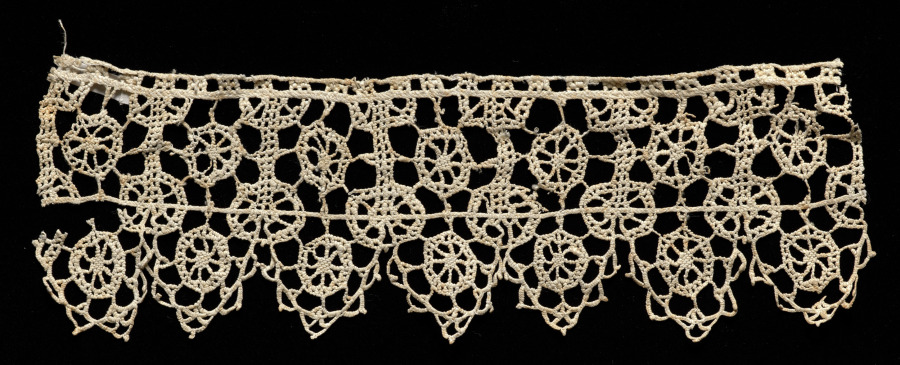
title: Fragment of Lace Edging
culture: Italy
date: 1600s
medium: Needle lace (punto avorio or ivory stitch) edging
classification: Lace